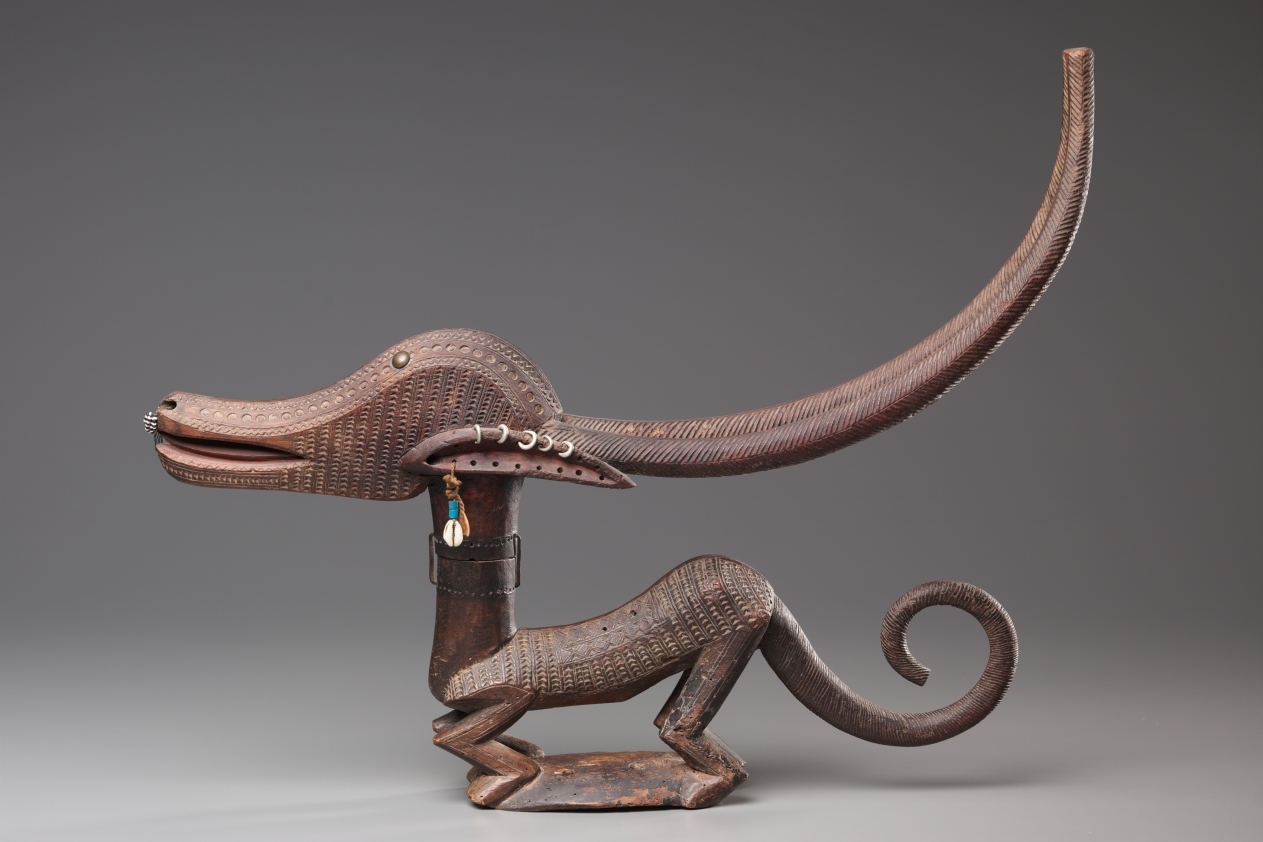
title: Headdress (chi wara)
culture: Africa, West Africa, Mali, Bamana-style blacksmith-carver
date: early to mid-1900s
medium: Wood, cowrie shells, glass beads, possibly aluminum, iron alloy, upholstery studs, and natural fibers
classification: Mask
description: Chi wara—a mythical “farming beast”—was said to teach farming to the Bamana people. Carved patterns cover this female chi wara’s body, highlighting its muscles and emphasizing that it is no earthly animal, but rather an agricultural spirit that combines human, antelope, and anteater elements. This example wears earrings and a nose ring of imported metals and beads. Its carver—a blacksmith—used a naturalistic style common south of the city of Bamako. Accompanied by women’s songs, male performers danced paired male-and-female chi wara headdresses affixed to basketry caps at agricultural competitions and weddings.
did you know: Chi wara headdresses look different depending on the region they were made in. The style of this example tells us it was likely made in the Djitoumou region of southern Mali.